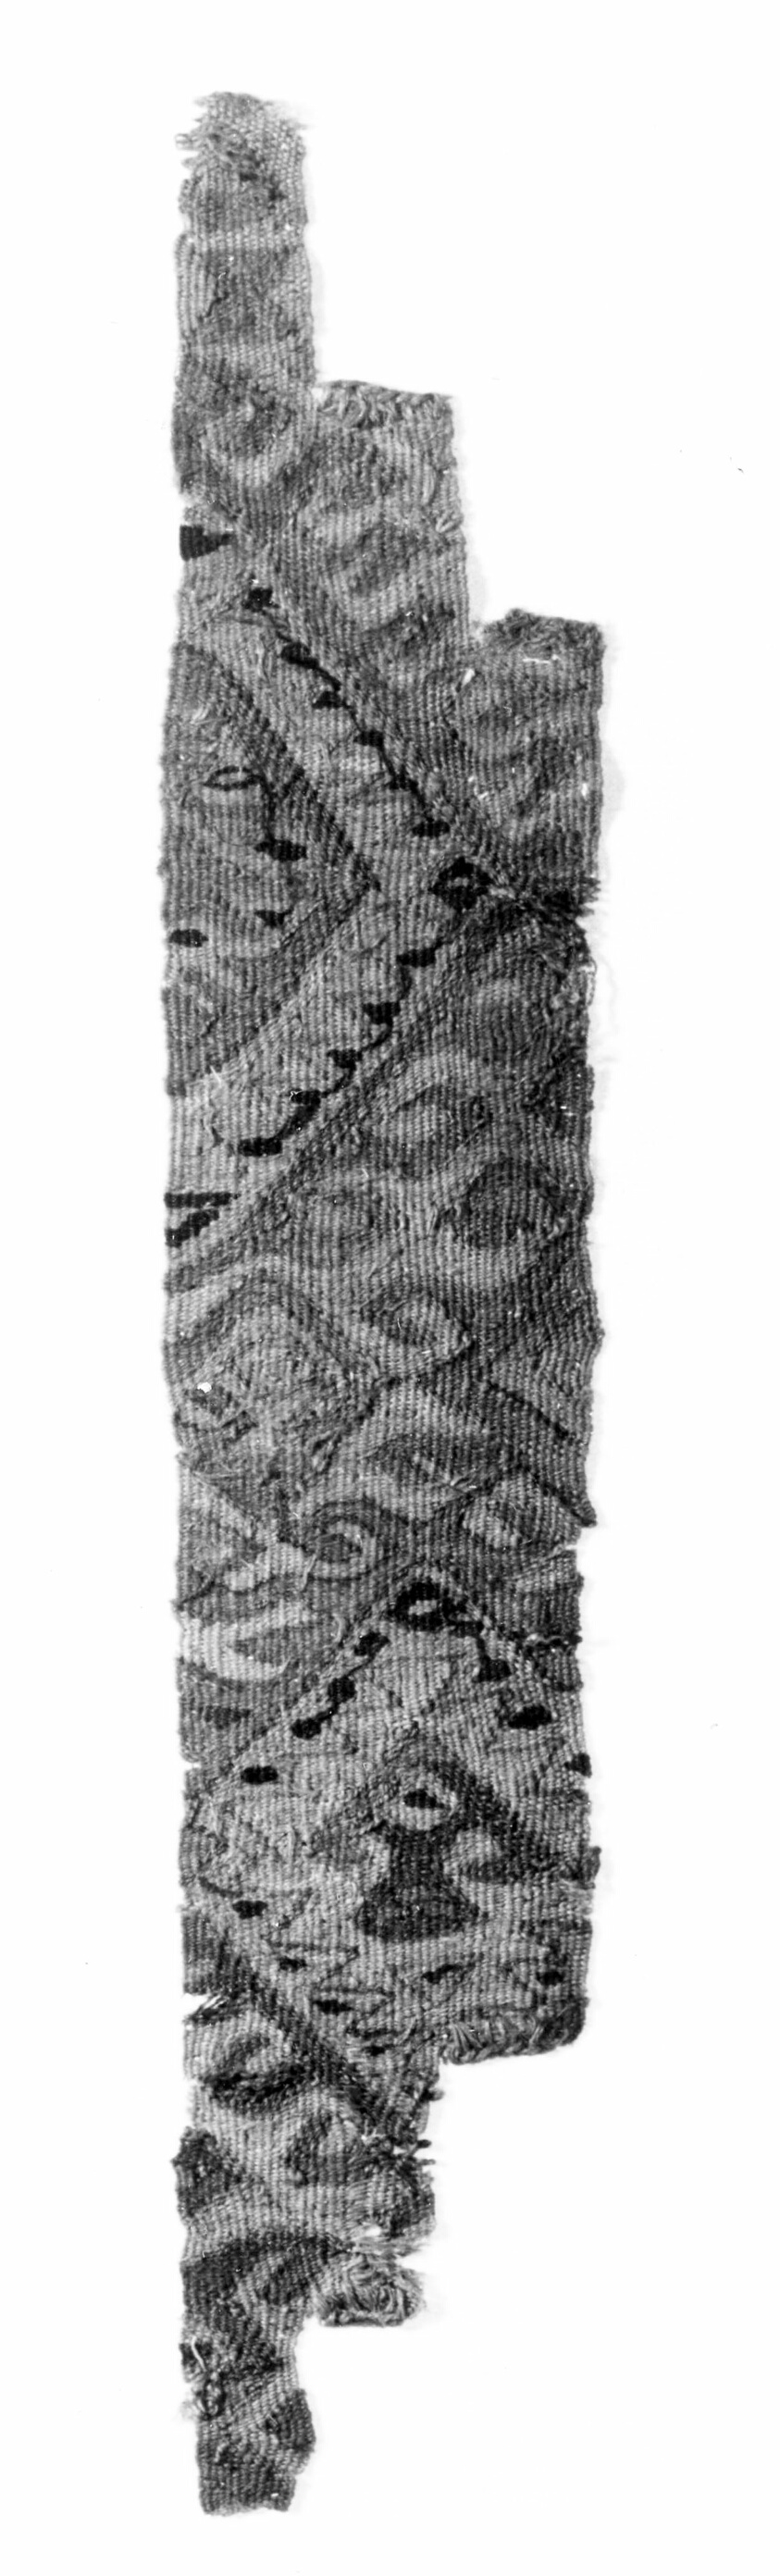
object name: Textile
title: Neck or Armhole Panel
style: ica, late intermediate period, Pre-Columbian, americas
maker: Ica (Peru, south coast, Ica Valley)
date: A.D. 1000/1532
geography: Peru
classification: textile; weaving; costume; dress (garment); clothing